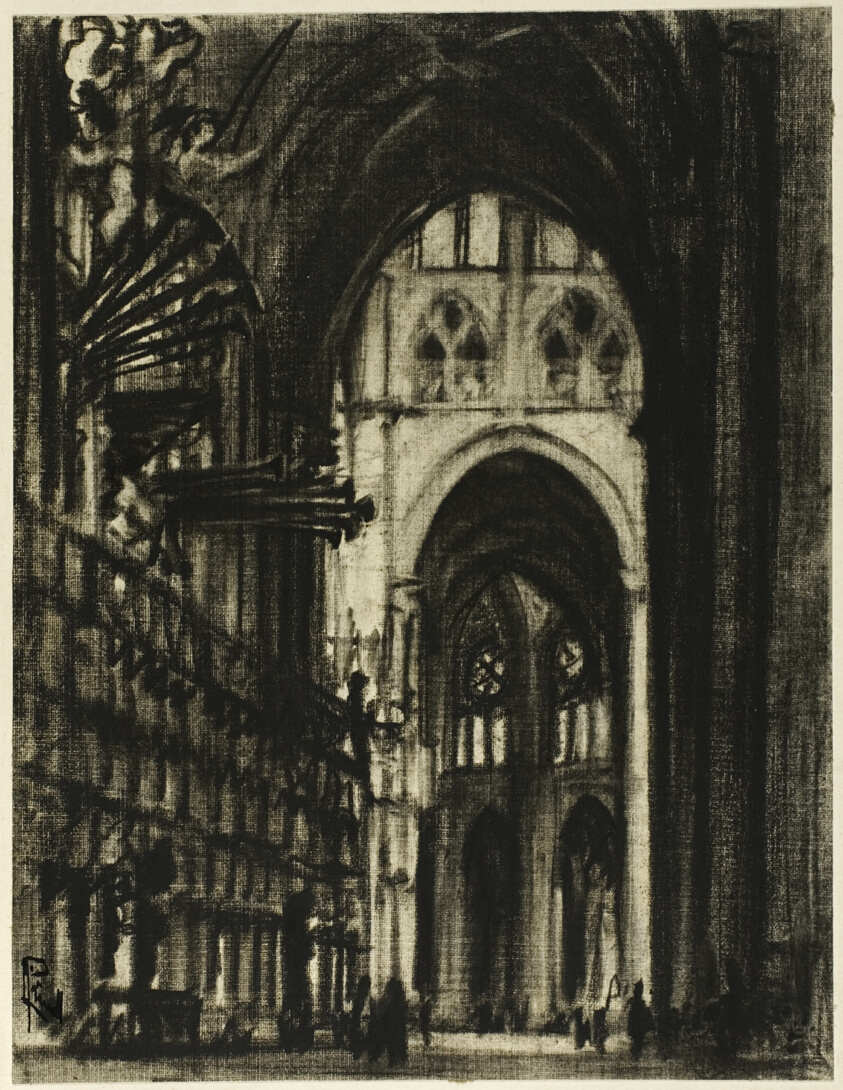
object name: Drawing and Watercolor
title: The Gilded Organ Pipes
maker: Joseph Pennell (American, 1857-1926)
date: c. 1903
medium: Oiled charcoal with erasing and stumping, on cream wove paper, perimeter mounted on off-white wood pulp laminate board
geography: United States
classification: charcoal; drawings (visual works); prints and drawing